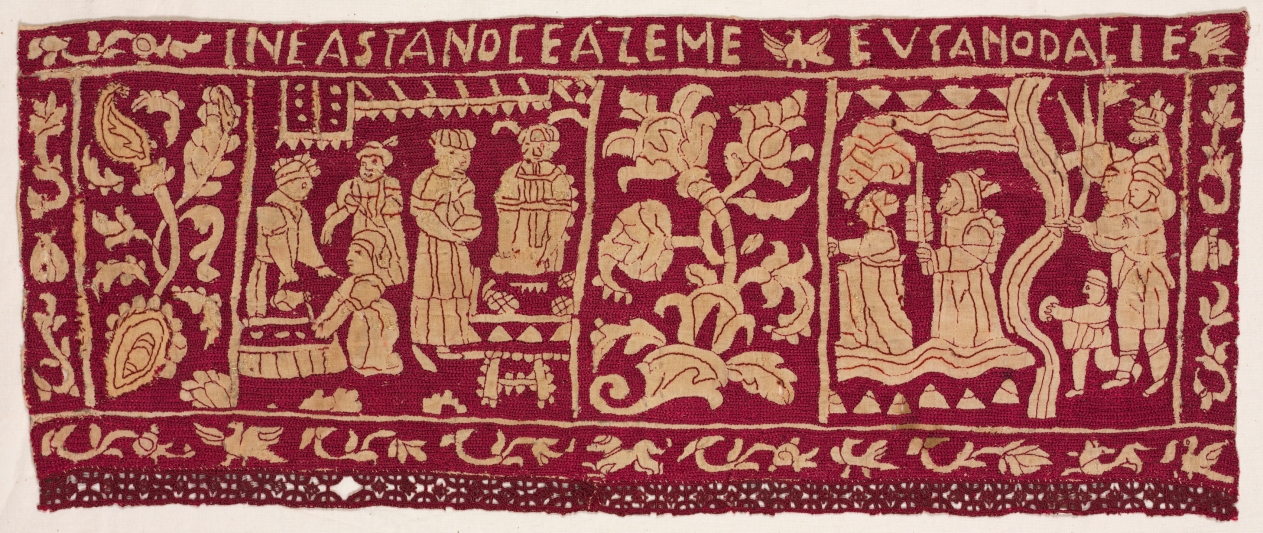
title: Embroidered Border: The Making of Unleavened Bread and the Israelites Sent Away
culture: Italy, 16th-17th century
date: 1500s-1600s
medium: Plain weave linen; embroidery in silk; attached border of needle lace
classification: Embroidery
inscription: Embroidered lettering in upper margin: INEASTANOCEAZEME / EVGANODACIE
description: The border fragments on the left tell the story of the Israelites baking unleavened bread during the first Passover, after which they were delivered out of captivity in Egypt. In the top panel, bakers mix and knead the dough; the bottom panel shows the bakers standing on a tiled floor while placing the bread into a brick oven. This common household scene would have been familiar to Italian audiences during the Renaissance. Two fragments depict events recorded in the book of Exodus. In the top panel, the pharaoh is shown releasing the Israelites after the last plague (1939.355). In the bottom panel, he changes his mind and pursues them across the parted Red Sea, only to be swallowed up after the Israelites safely crossed (1939.352).